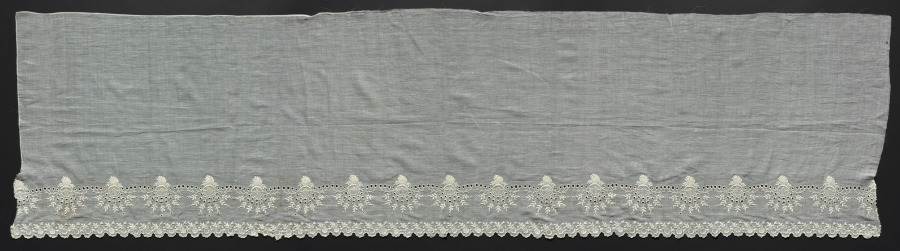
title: Portion of a Flounce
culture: Italy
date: 1800s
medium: Plain weave cotton: needle lace (drawnwork) and embroidery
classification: Embroidery